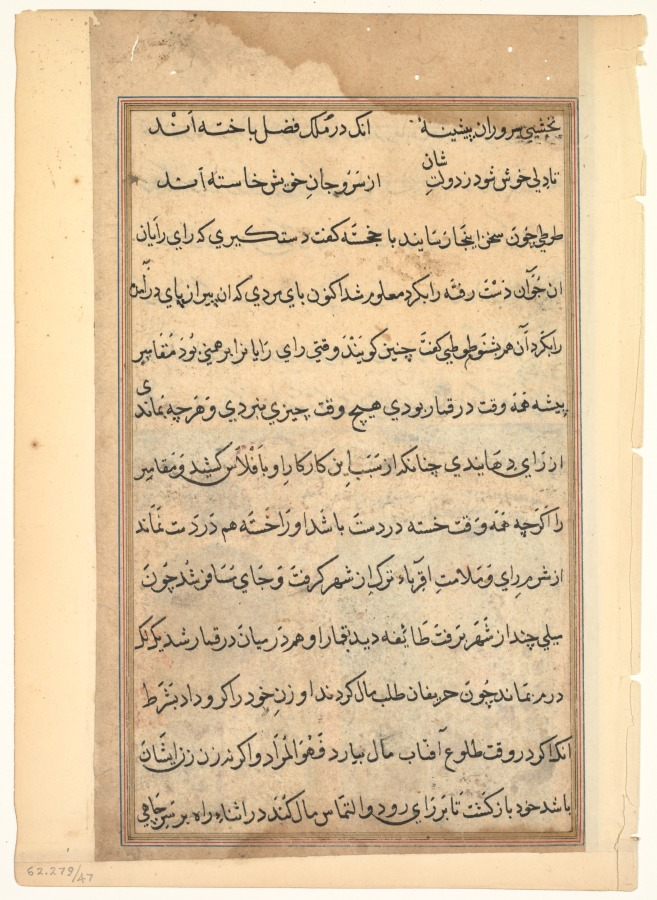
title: Page from Tales of a Parrot (Tuti-nama): text page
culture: Mughal India, court of Akbar (reigned 1556–1605)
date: c. 1560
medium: gum tempera, ink, and gold on paper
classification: Painting